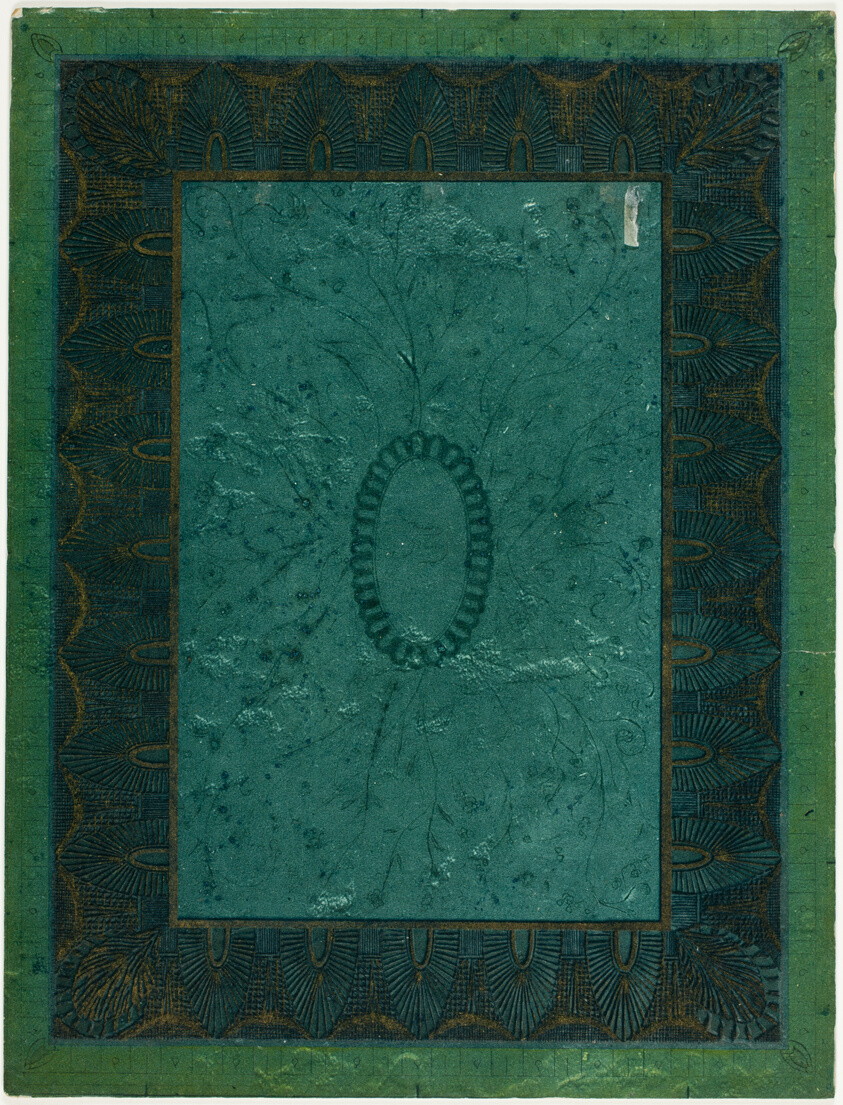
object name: Print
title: Mount for La Chine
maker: Theodore Roussel (French, worked in England, 1847-1926)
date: 1897–99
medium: Color etching, aquatint, softground, and drypoint on ivory wove paperboard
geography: England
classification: etching; aquatint; paper; print; prints and drawing